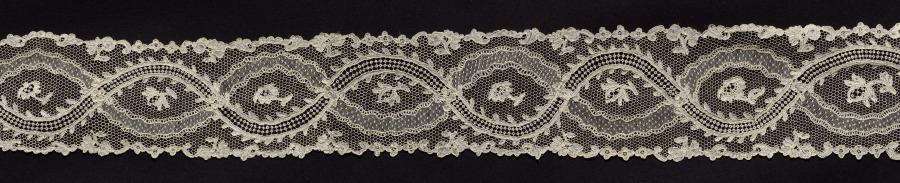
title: Lace Lappet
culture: France, Argentan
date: 1715–74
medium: Linen: needle lace (Point de Argentan)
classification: Lace